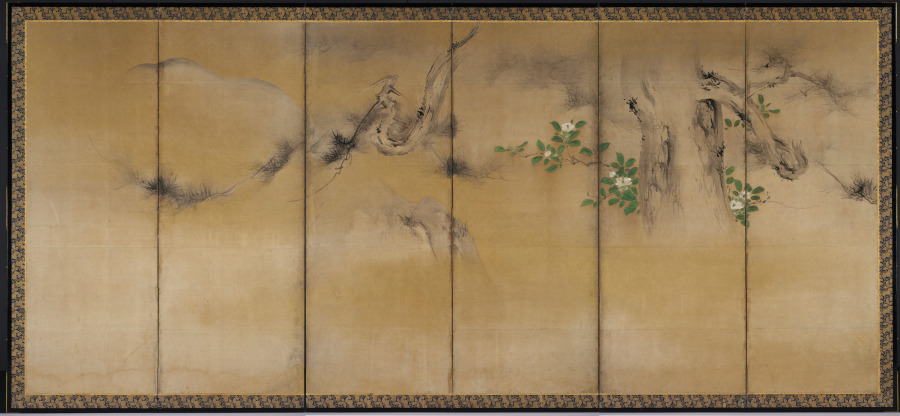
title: Winter and Summer Flowers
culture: Japan, Momoyama period (1573–1615)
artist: Kaihō Yūshō (Japanese, 1533–1615)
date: c. 1600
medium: One of a pair of six-panel folding screens; ink, color, and gold on paper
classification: Painting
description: White camellias bloom behind a large pine in the right screen and blue morning glories creep through bamboo in the left screen of this composition. The mountains and bridge suggest a continuous landscape, but the paintings actually juxtapose flowers of winter and summer, with time progressing from right to left. Kaihō Yūshō painted similar landscapes for Zen temples in Kyoto.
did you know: The pine and bamboo are defined by ink wash, but the flowers take form through color within contour lines.